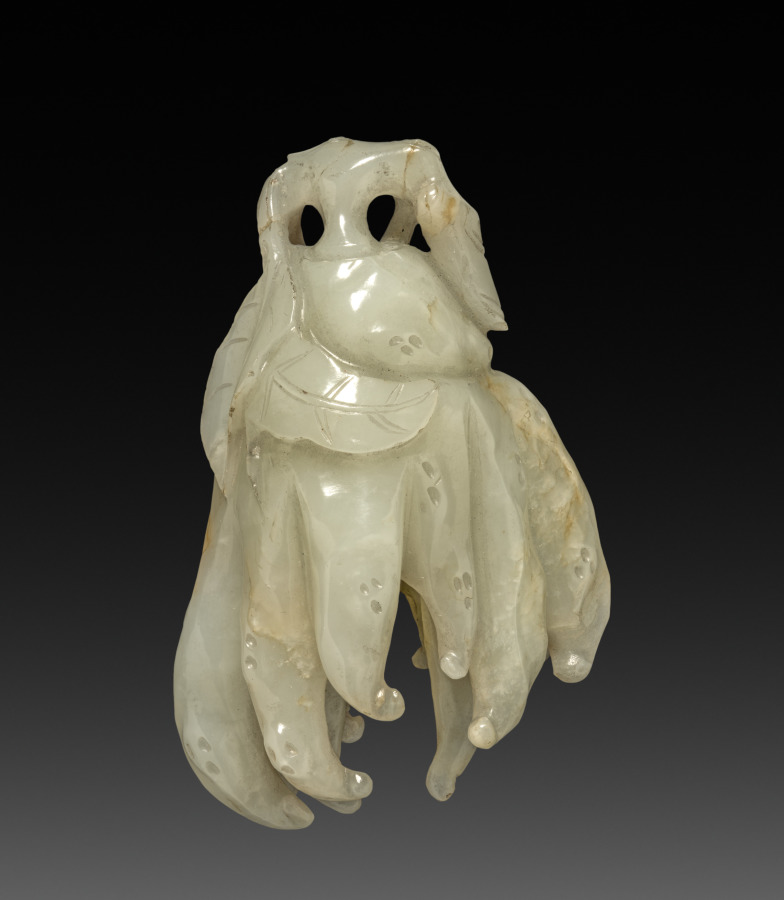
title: Pendant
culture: China, Qing dynasty (1644-1911)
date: 1644–1911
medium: jade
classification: Jade